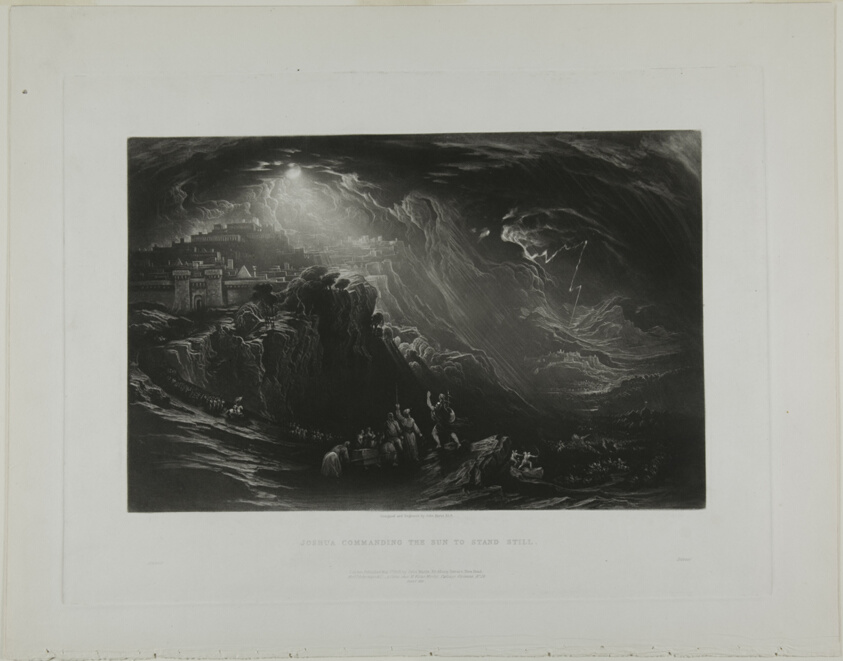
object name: Print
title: Joshua Commanding the Sun to Stand Still, from Illustrations of the Bible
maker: John Martin (English, 1789-1854)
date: 1835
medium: Mezzotint in black on ivory wove paper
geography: England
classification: mezzotint; print; prints and drawing